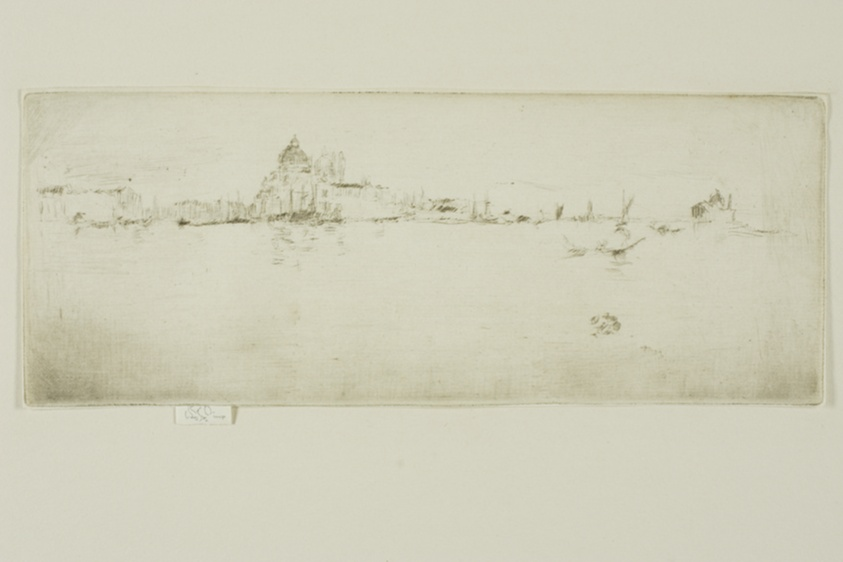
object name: Print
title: Little Salute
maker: James McNeill Whistler (American, 1834-1903)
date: 1879/80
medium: Drypoint in black ink on ivory laid paper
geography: United States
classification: drypoint; prints and drawing; print; paper